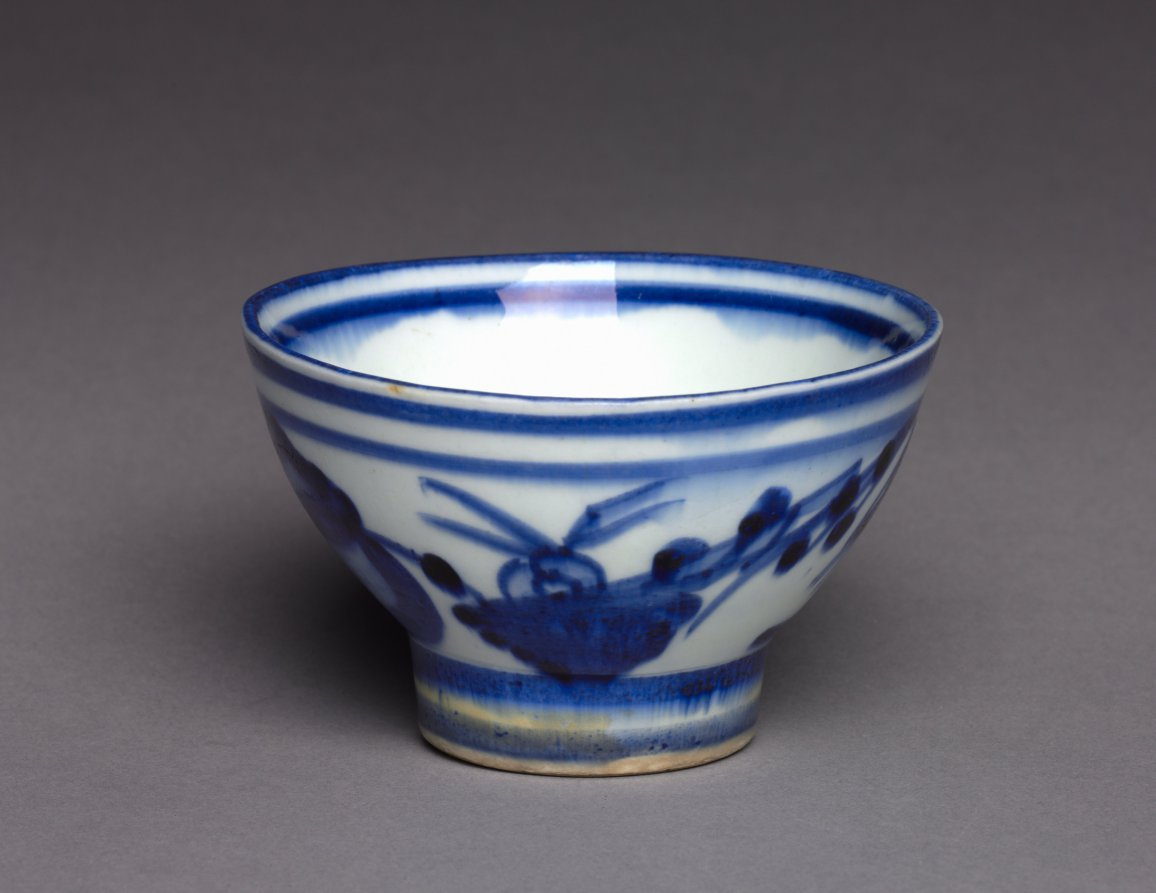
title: Tea Bowl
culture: France, Chantilly, late 18th-early 19th century(?)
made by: Chantilly Porcelain Factory (French)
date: 1800s ?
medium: porcelain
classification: Ceramic